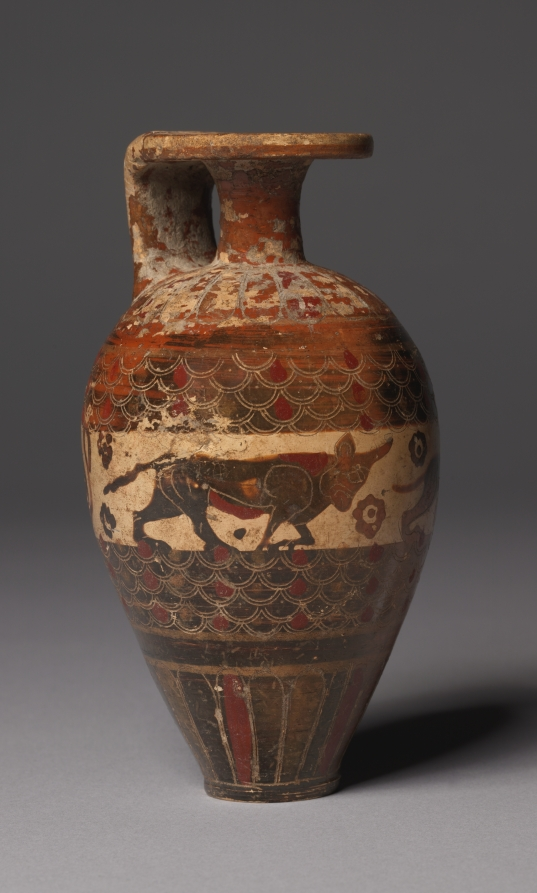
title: Protocorinthian (Early Black-Figure) Aryballos (Oil Flask): Animals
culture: Greek, Corinthian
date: c. 650–640 BCE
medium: ceramic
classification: Ceramic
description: Tongues encircle the rim, shoulder, and base of this small oil vessel, while two carefully incised bands of scales frame an animal frieze. Here, amid dot rosettes, are a bull, dog, and goat, all facing right, and a left-facing lion with head turned back. The black glaze has misfired red in many places, while added red enlivens numerous tongues, scales, and internal details.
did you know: Artists may have used a compass-like tool to create the intricate scale patterns.